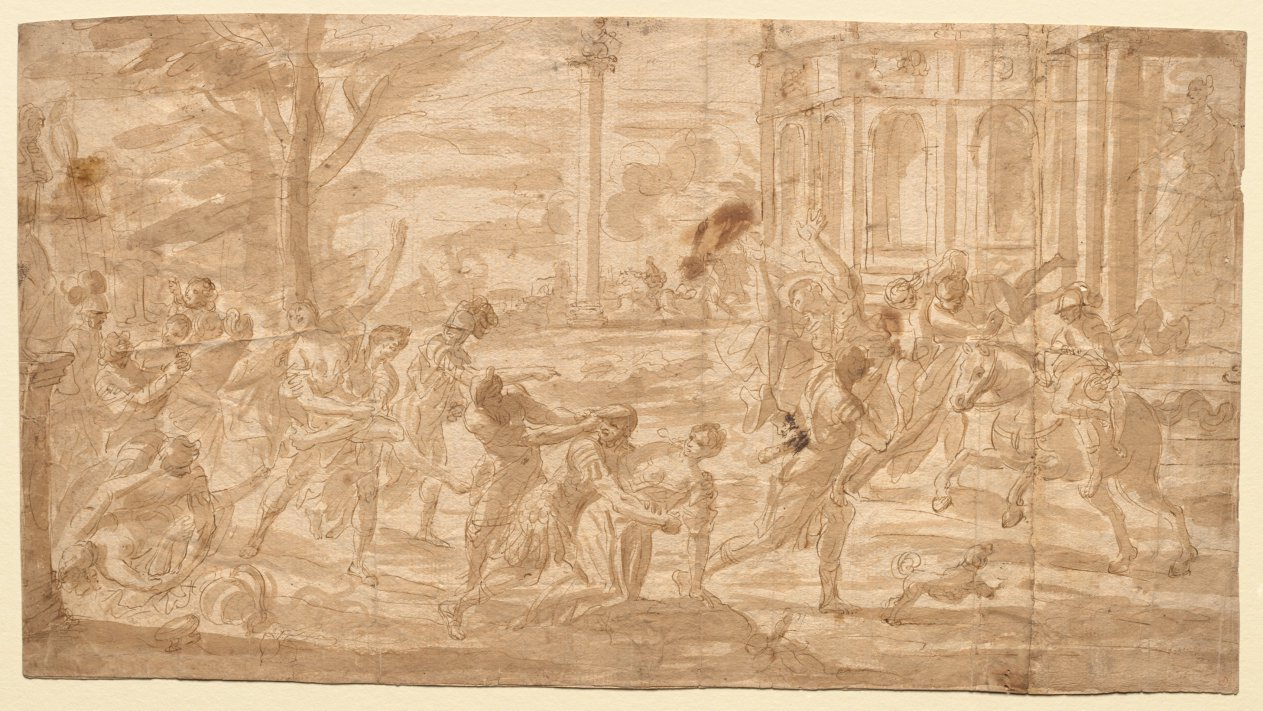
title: Rape of the Sabines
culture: France, 18th century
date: 1700s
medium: pen and brown ink and brush and brown wash, with traces of black chalk?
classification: Drawing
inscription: VERSO, upper right, in brown ink: 155 [partially masked] ; center, in graphite: Colln [illegible] Wm. Baillie ; center, in graphite: 427/532 ; lower left, in brown ink: [Gandolfi?] [upside down] ; lower left, in brown ink: M/disegni 50 [upside down] ; lower center, in graphite: Poussin ; lower center, in graphite: 444 [circled] ; lower right, in graphite: 163 ; ON SEPERATELY APPLIED PIECE OF PAPER, verso, center right, printed in black in: 111 Poussin, Nicolas. 1594-1665 RAPES OF THE SABINES. 11 in. x 20 1/4 in. / Pen and wash drawing, 21